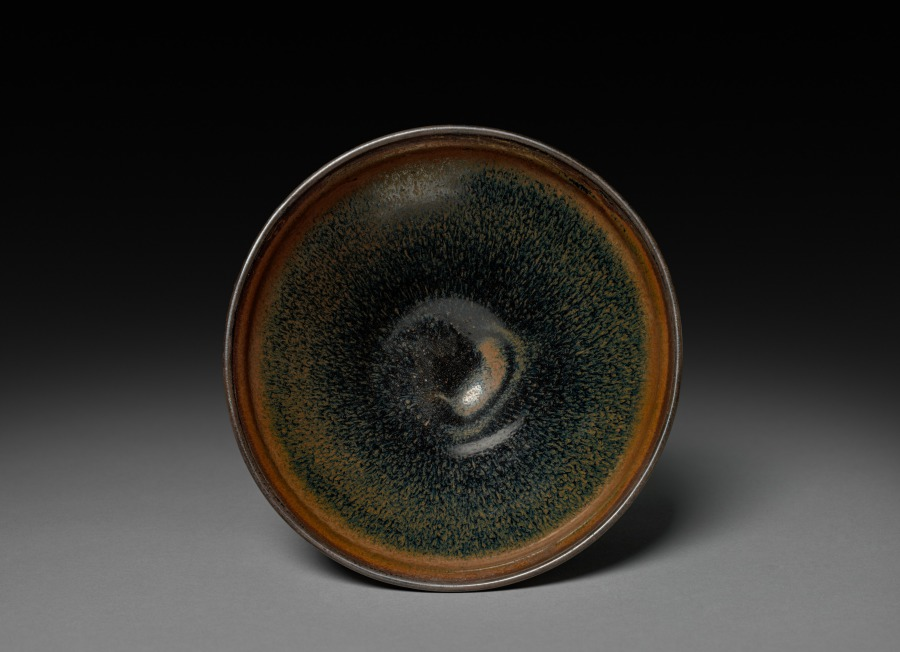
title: Tea Bowl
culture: China, Fujian province, Song dynasty (960-1279)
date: 960–1279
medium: purplish brown stoneware with iron slip glaze coating, Jian ware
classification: Ceramic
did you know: Jian ware was very popular with the tea cultures in China and Japan.